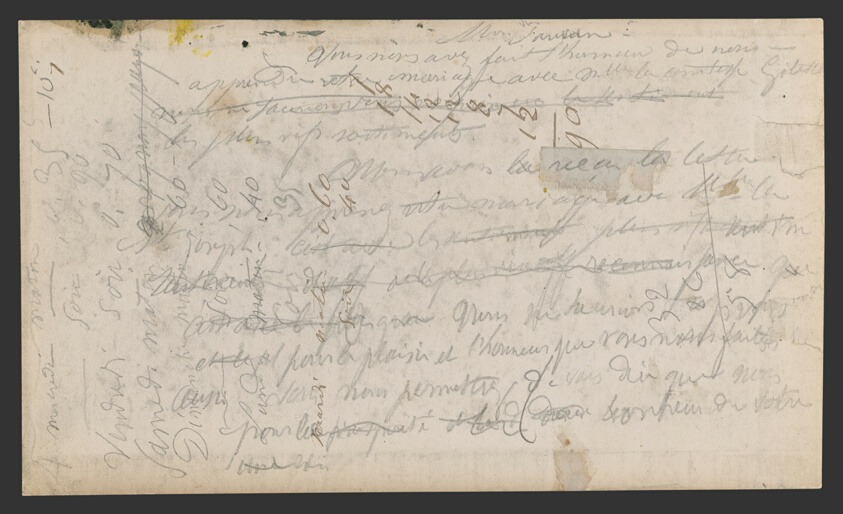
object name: Drawing and Watercolor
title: Sketchbook No. 2 (L'Estaque)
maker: Paul Cézanne; French, 1839-1906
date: 1875–86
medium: Graphite and pen and ink drawings on paper, bound into a book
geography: France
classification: sketchbook; graphite; prints and drawing; paper